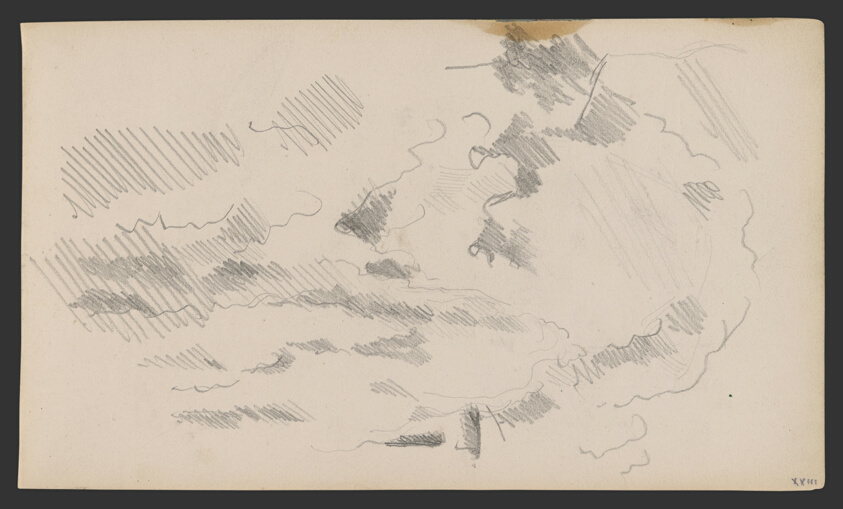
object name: Drawing and Watercolor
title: Sketchbook No. 2 (L'Estaque)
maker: Paul Cézanne; French, 1839-1906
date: 1875–86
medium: Graphite and pen and ink drawings on paper, bound into a book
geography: France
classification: sketchbook; graphite; prints and drawing; paper